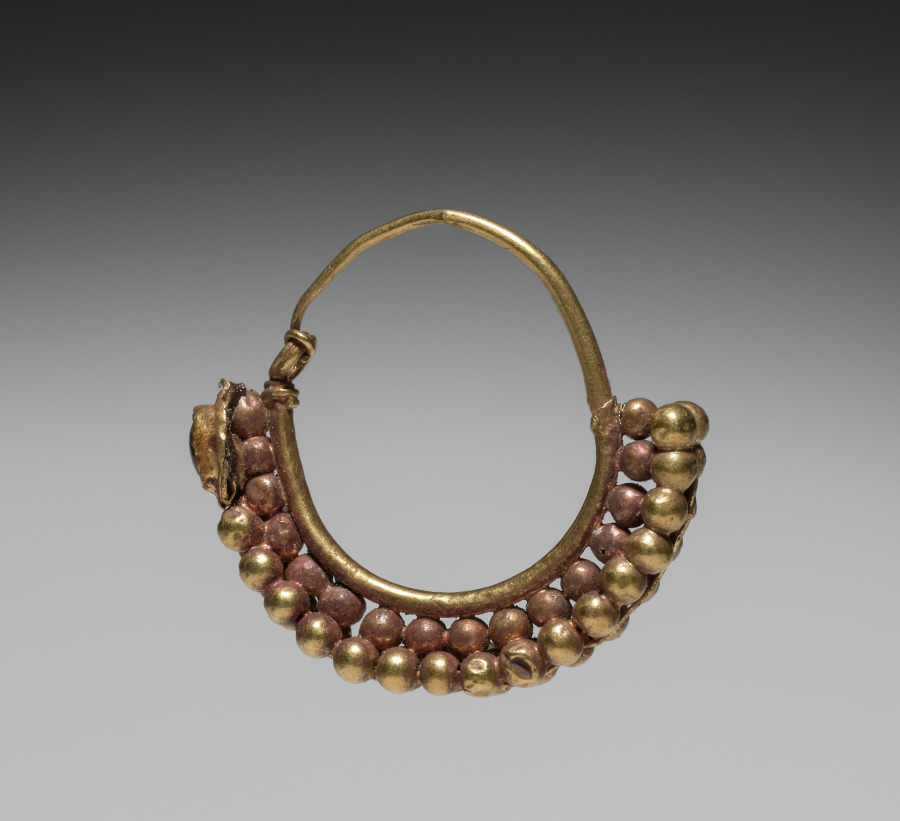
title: Earring (one of a pair)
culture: Syria, Roman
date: 100 BCE–100 CE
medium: gold and garnet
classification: Jewelry